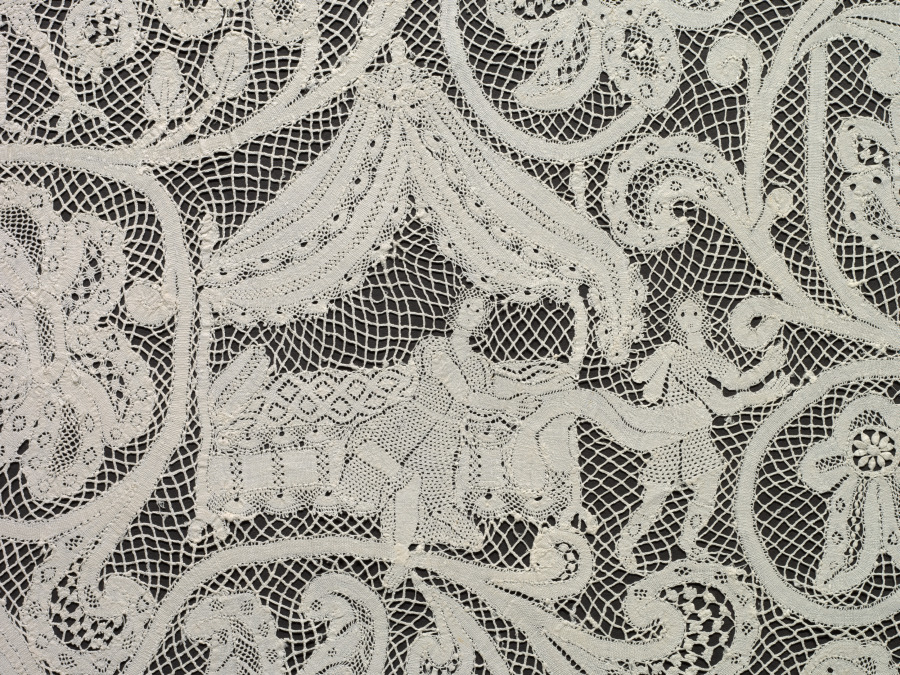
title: Lace Flounce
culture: Italy, Milan(?)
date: 1750–99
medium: Linen: bobbin lace (Punto di Milano)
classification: Lace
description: Being the most prestigious material, lace was used extensively by the 1600s for altar linen and for trimming priest’s albs, often incorporating finely rendered religious images amid blossoming vines. This alb flounce depicts scenes from the Old Testament story of Joseph, whose jealous brothers sold him to a caravan bound for Egypt. Joseph later interpreted dreams of the pharaoh, who made him ruler. When famine in Canaan caused Joseph’s ten brothers to travel to Egypt in search of food, they bowed down to him. After he revealed his identity, he forgave his brothers and God saved the family.